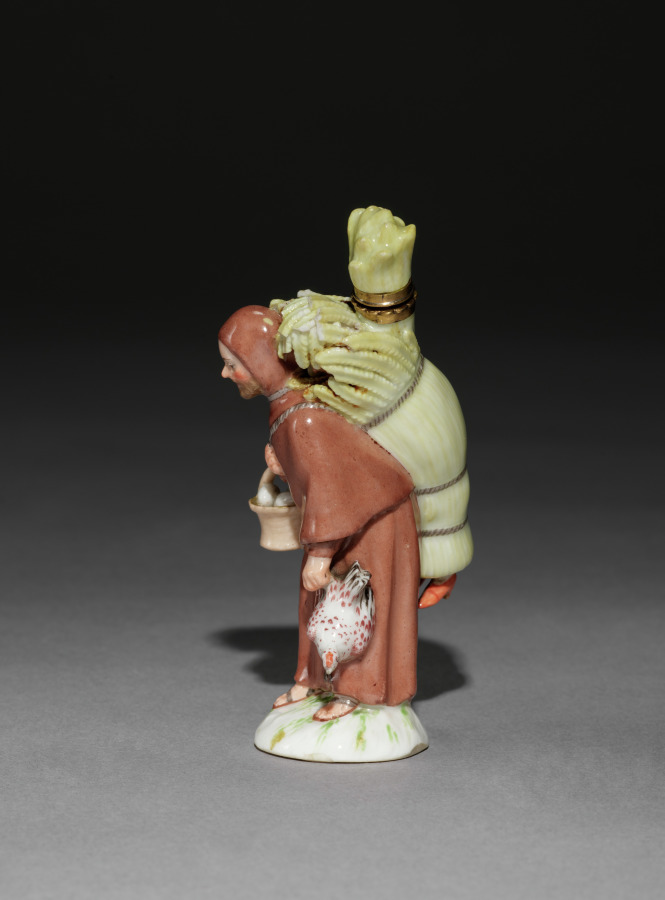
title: Scent Bottle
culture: Germany, Berlin, 18th century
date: 1780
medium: porcelain with gilt metal mounts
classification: Miscellaneous